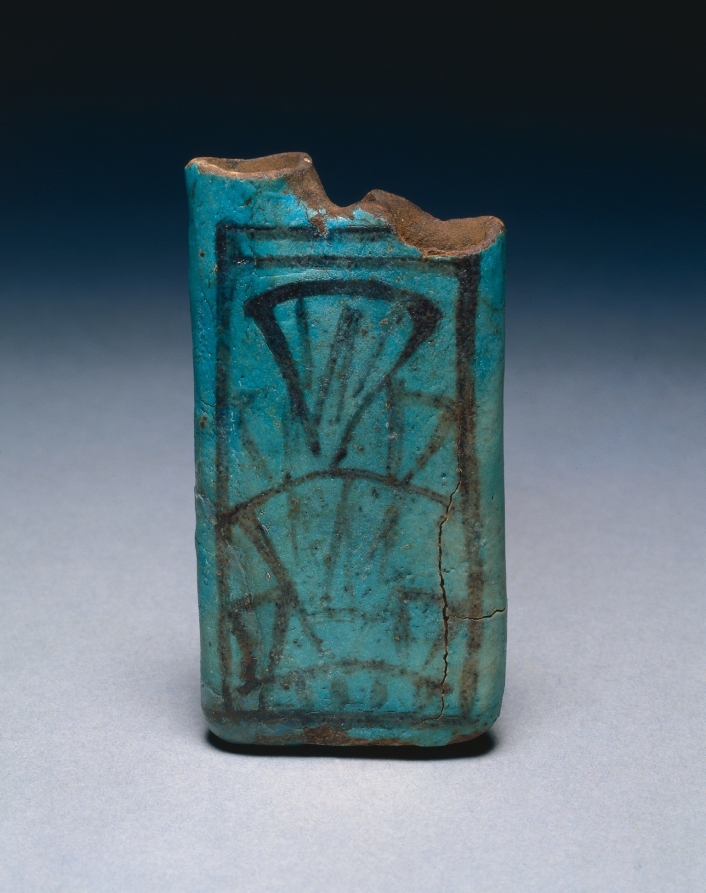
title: Kohl Container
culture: Egypt, New Kingdom (1540–1069 BCE), Dynasty 19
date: 1295–1188 BCE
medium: turquoise faience with black painted decoration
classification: Cosmetic Objects